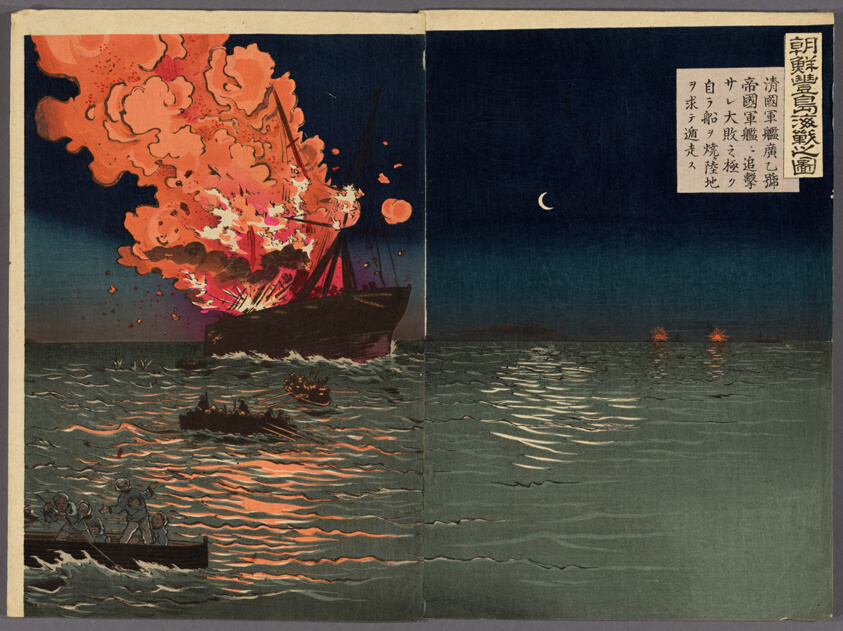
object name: Print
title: The Naval Battle of Pungdo in Korea (Chosen Hoto kaisen no zu)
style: Japanese (culture or style)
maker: Kobayashi Kiyochika (Japanese, 1847-1915)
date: 1894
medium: Color woodblock print; two sheets from oban triptych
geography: Japan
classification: woodblock print; print